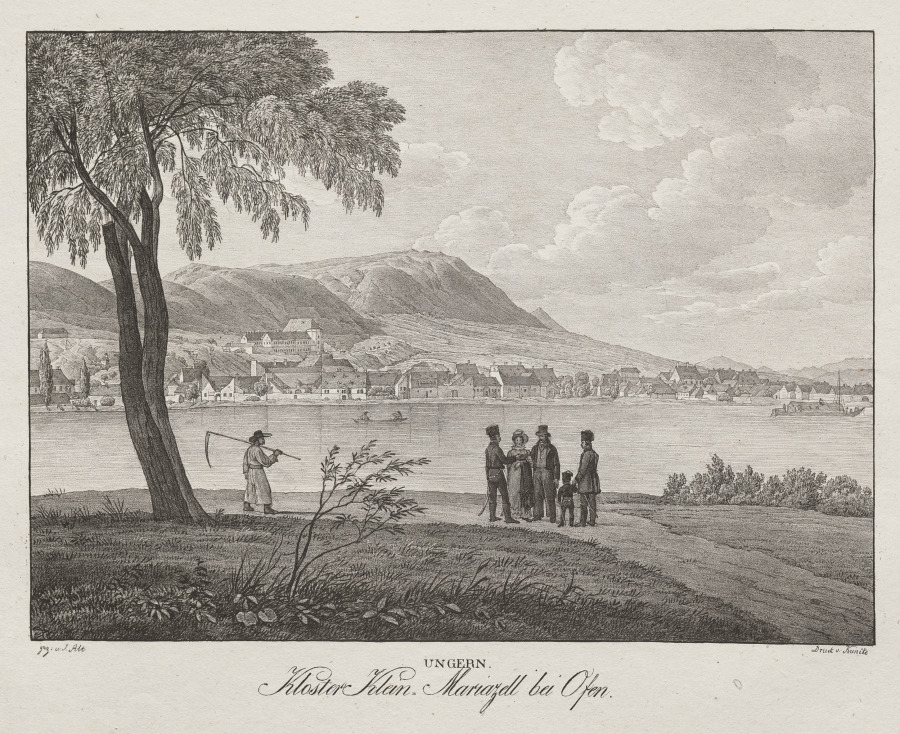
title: Ungern, Kloster Klein, Mariazell bei Ofen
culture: Austria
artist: Jakob Alt (Austrian, 1789–1872)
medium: lithograph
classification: Print